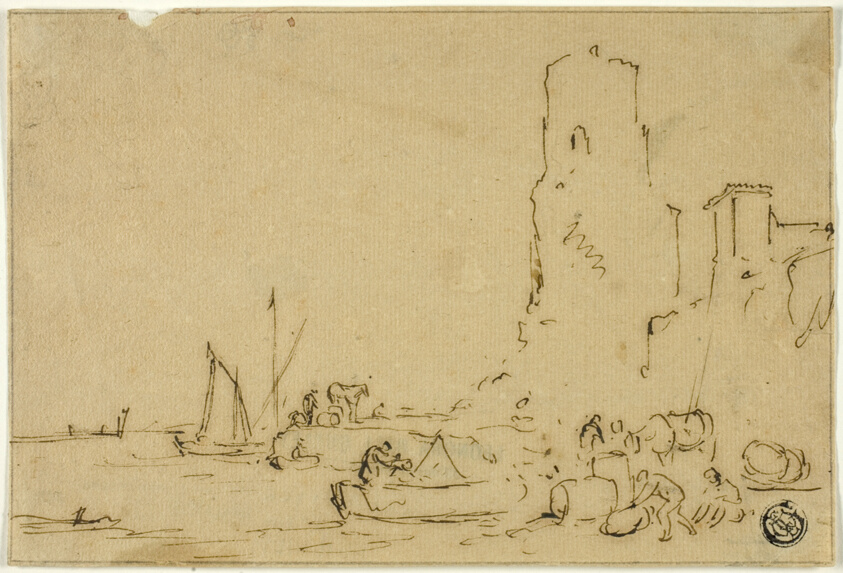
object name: Drawing and Watercolor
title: Fishermen Barreling Fish at Water's Edge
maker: Attributed to Thomas Wyck; Dutch, 1616-1677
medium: Pen and brown ink, on buff laid paper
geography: Holland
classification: pen and ink drawings; drawings (visual works); prints and drawing